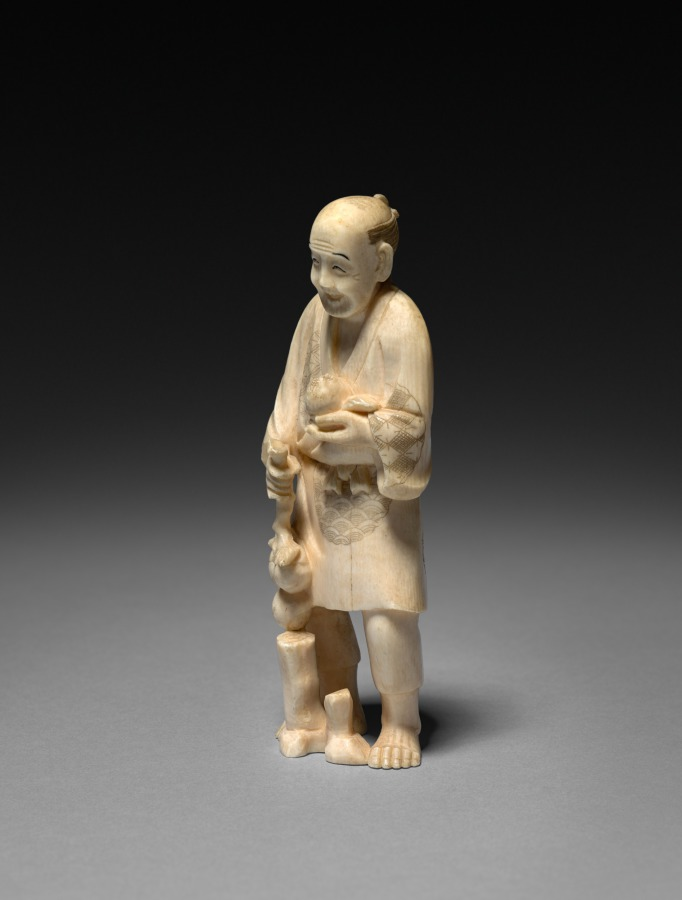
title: Man Holding Fruit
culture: Japan, Meiji period (1868–1912)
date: early 1900s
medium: ivory, pigment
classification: Ivory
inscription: 光江